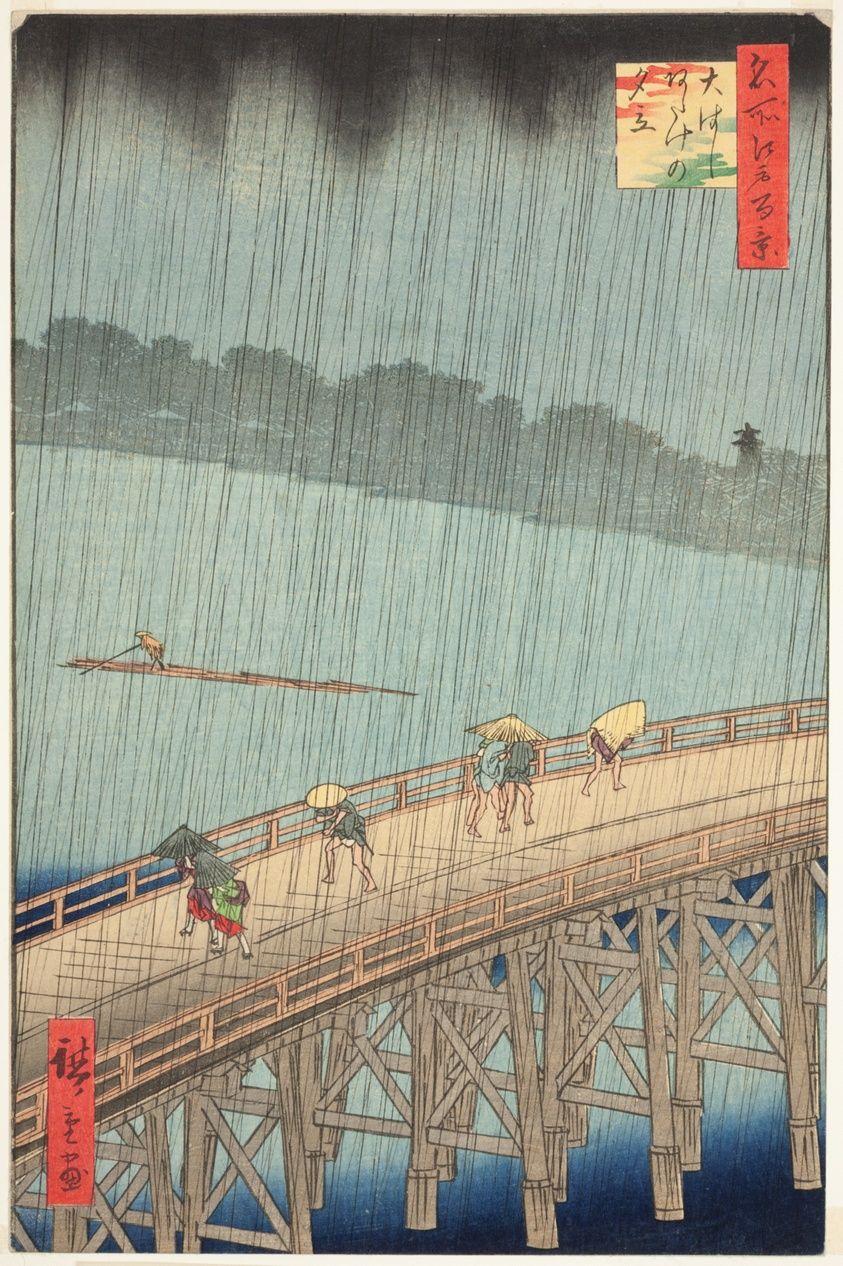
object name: Print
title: Sudden Shower over Shin Ohashi Bridge and Atake (Ohashi Atake no yudachi), from the series "One Hundred Famous Views of Edo (Meisho Edo hyakkei)"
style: Japanese (culture or style)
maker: Utagawa Hiroshige 歌川 広重; Japanese, 1797-1858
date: 1857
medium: Color woodblock print; oban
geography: Japan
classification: woodblock print; print; asian art